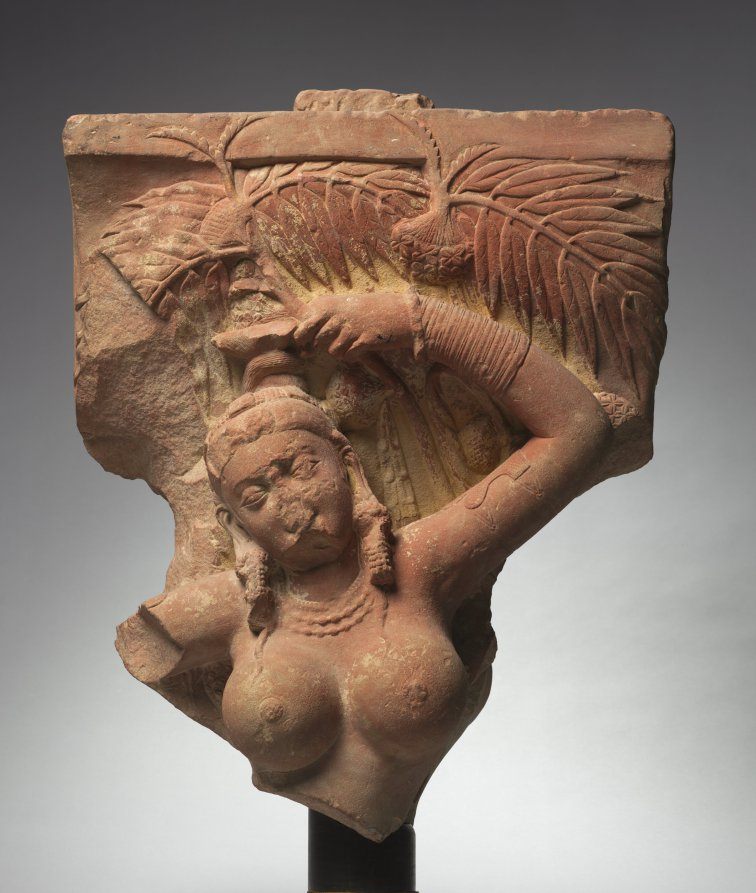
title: Gateway Bracket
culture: India, Mathura, Kushan period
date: 150–200 CE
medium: sandstone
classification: Sculpture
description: Gateways leading into a sacred area often had large horizontal architraves, the weight of which was supported by brackets carved with figures of voluptuous women grasping the branch of a tree. They embody the ideal form of the young mother, with breasts full of nourishing milk. As personifications of the sap that pervades living plants, they are auspicious markers of life and abundance. These attractive figures, who embody the purifying water essential for life, symbolically cleanse visitors as they enter the sacred space. On both sides of this large bracket they grasp the branch of an ashoka tree, which has clusters of flowers that are bright red in nature.